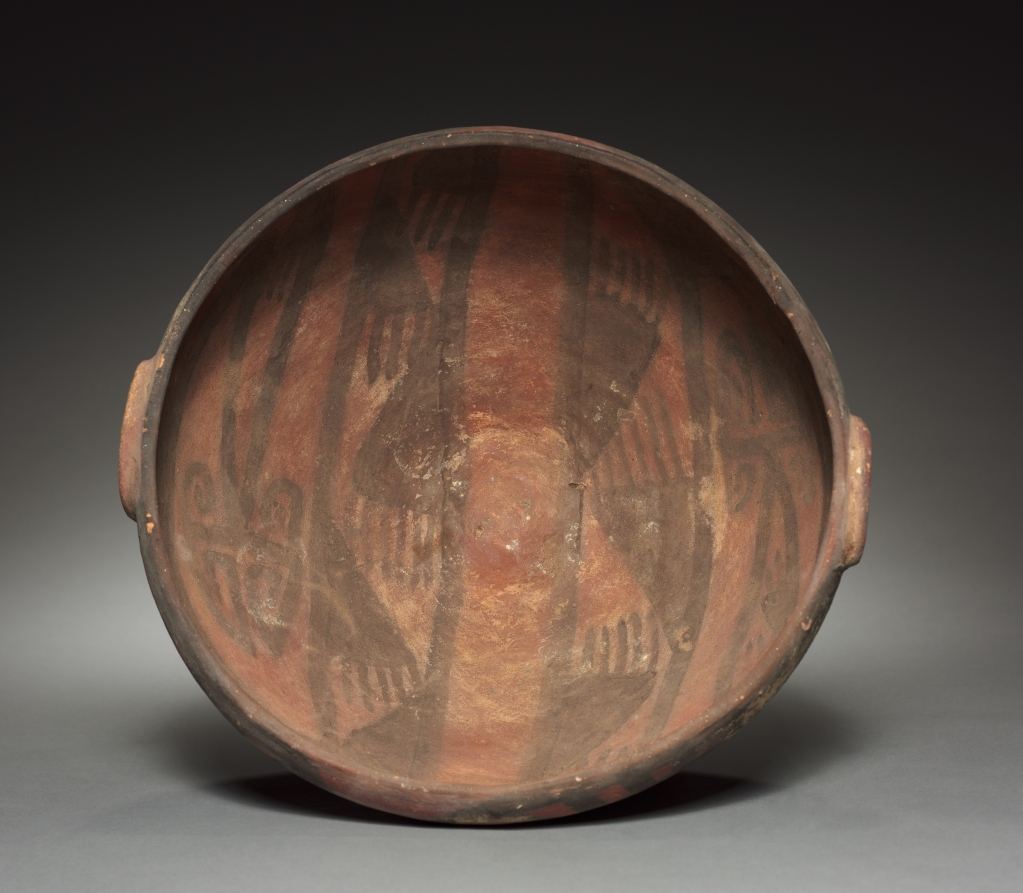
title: Two-Handled Bowl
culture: Argentina, Santamariana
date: 1000–1500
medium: earthenware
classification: Ceramic